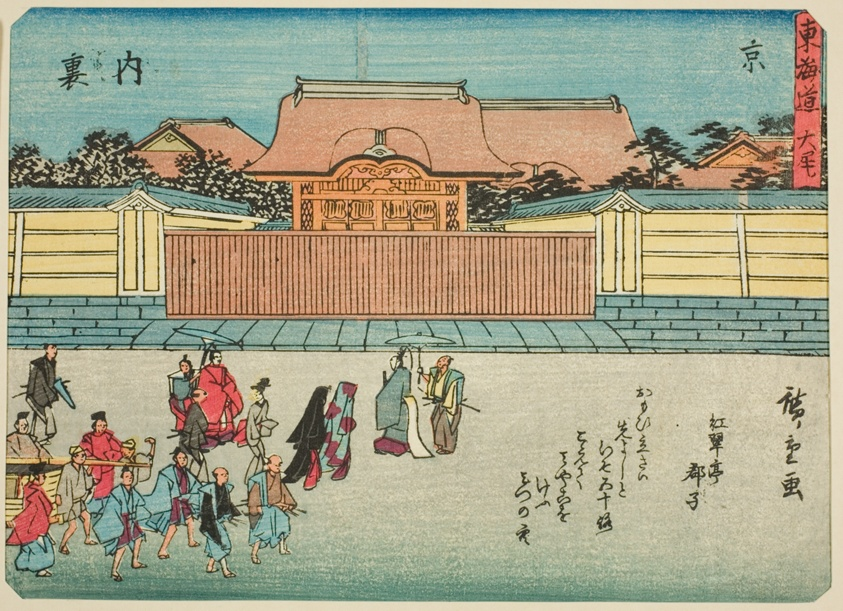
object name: Print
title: Kyoto: The Imperial Palace (Kyo, Dairi), from the series "Fifty-three Stations of the Tokaido (Tokaido gojusan tsugi)," also known as the Tokaido with Poem (Kyoka iri Tokaido)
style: Japanese (culture or style)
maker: Utagawa Hiroshige 歌川 広重; Japanese, 1797-1858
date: c. 1837/42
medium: Color woodblock print; chuban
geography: Japan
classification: woodblock print; print; asian art